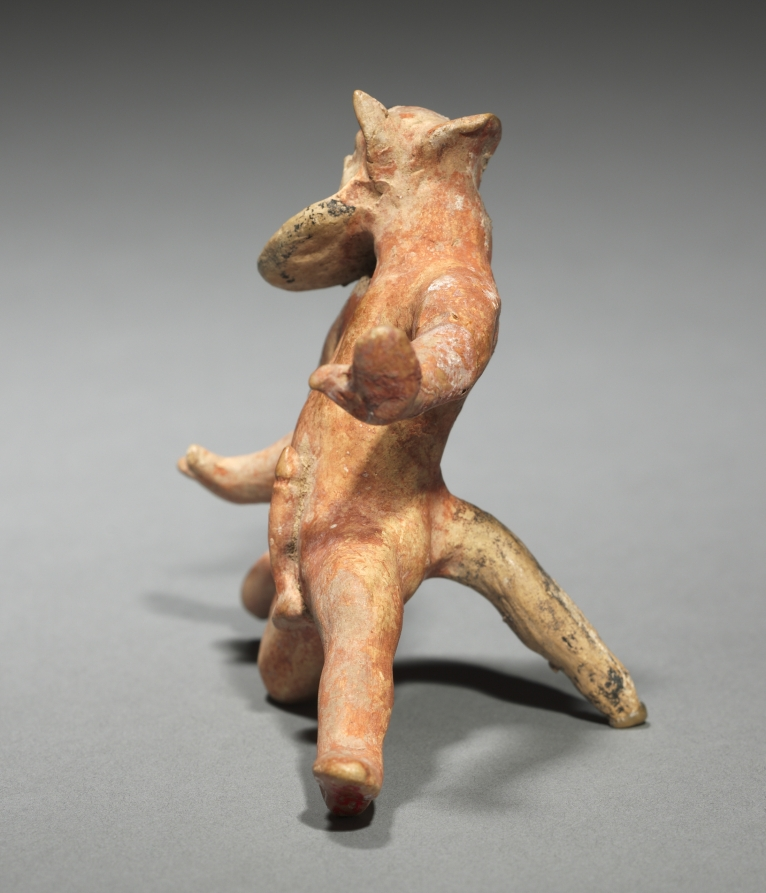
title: Dancing Satyr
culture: Greece, Boeotia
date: 500–475 BCE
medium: painted terracotta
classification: Sculpture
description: Part man and part beast, satyrs were mythical woodland creatures. In art, they were depicted with the ears and tail of a goat or horse, sometimes with hooves, and in a high state of sexual arousal. Satyrs often accompanied Dionysus, the god of wine, in his drinking bouts and other escapades. These three probably once decorated the rim of a large punch-bowl-shaped vessel for serving wine.